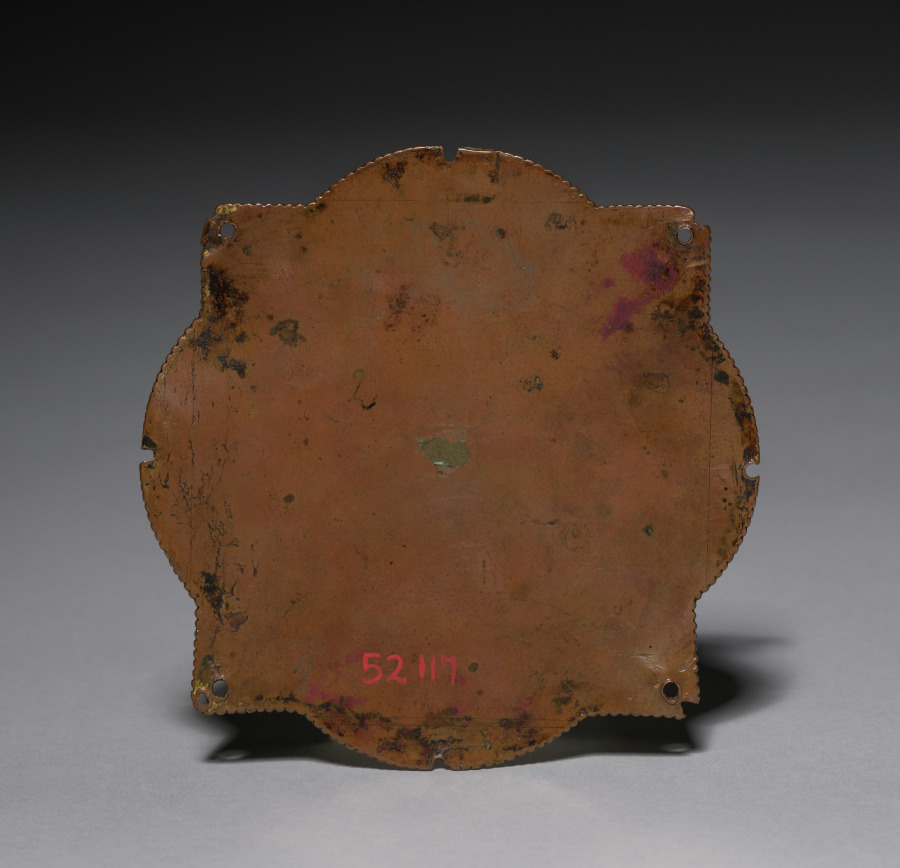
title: Enamel Plaque: Crucifixion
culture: Valley of the Meuse, 12th century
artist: workshop of Godefroid of Claire (Mosan)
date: 1100s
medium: champlevé enamel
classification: Enamel